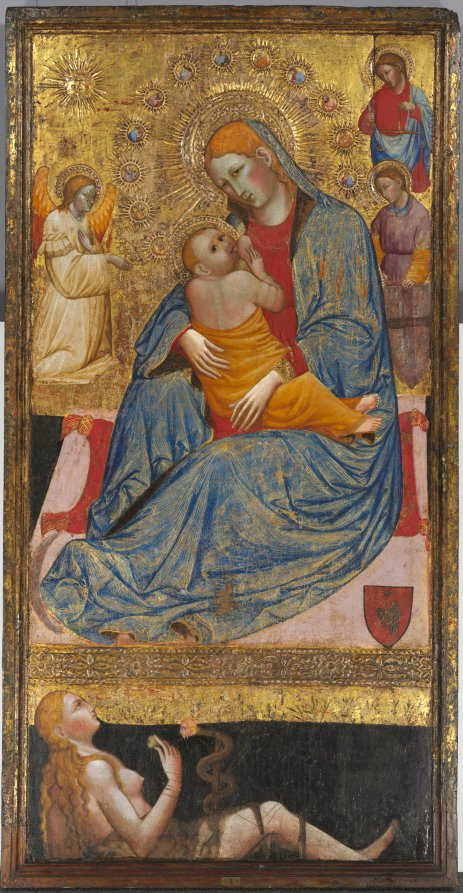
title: The Madonna of Humility with the Temptation of Eve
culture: Italy, the Marches, late 14th-early 15th Century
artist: Olivuccio di Ciccarello (Italian, Marche, 1360/65–1439)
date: c. 1400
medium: tempera and gold on wood panel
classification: Painting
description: The Madonna is seated humbly on the ground nursing her child. Saint George and the Archangels Gabriel and Michael kneel nearby, while Christ’s disciples appear radiating from the Madonna’s halo in the form of stars. In contrast with the Virgin’s purity, Eve lies in the lower part of the painting. Coaxed by the serpent, she raises the forbidden fruit to her mouth, thus condemning humankind through her original sin. The juxtaposition of these two images affirms the Incarnation and the role of Christ and the Virgin in the redemption story. The deep scratches on the surface of the panel, especially on the serpent’s face and Eve’s wrist, likely resulted from a zealous Christian’s symbolic attack on the power of evil. The artist, Olivuccio di Ciccarello, is known to have been active in the Marche in central Italy. Little is known of his life except that he was an important and prolific painter in Ancona, where he died. His paintings were formerly attributed to Carlo da Camerino, an apparently nonexistent artist, on the basis of a mistaken reading of his signature on a crucifix.